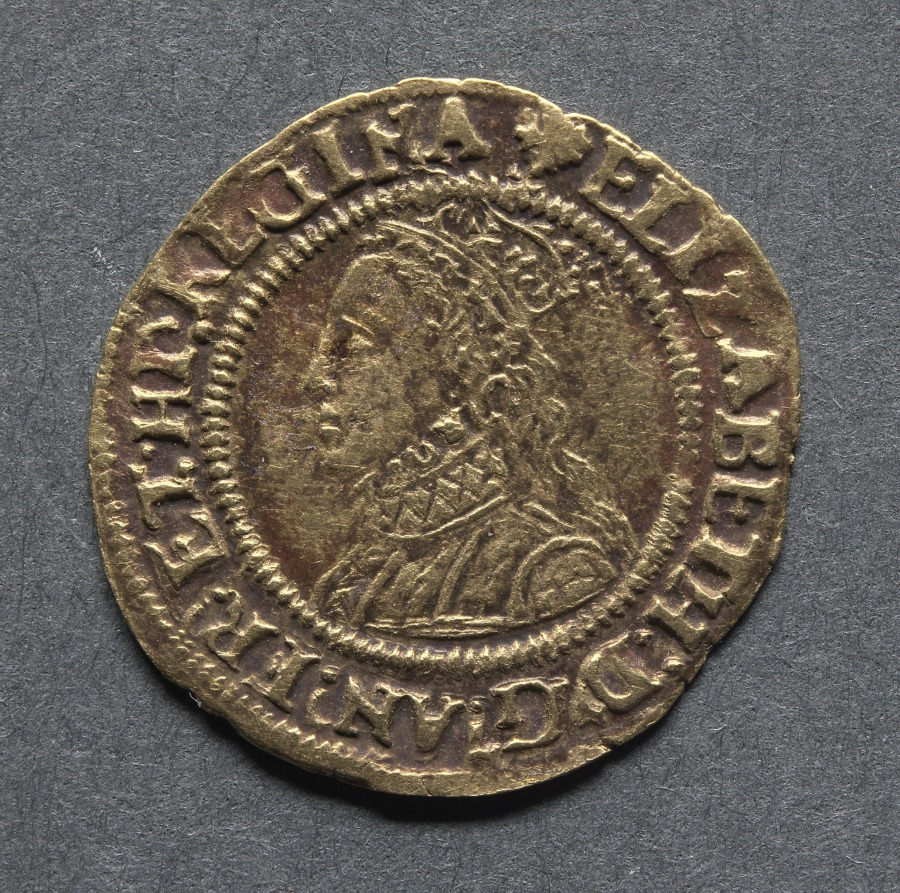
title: Halfcrown: Elizabeth I (obverse); Crowned Shield of Arms (reverse)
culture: England, Elizabeth I, 1558-1603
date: 1560–61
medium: gold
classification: Coins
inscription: ELIZABETH D G AN FR ET HI REGINA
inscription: SCVTVM FIDEI PROTEGET EAM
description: A rare coin, the portrait of the queen is very well executed. There are two types of this coin that feature a bust of the queen. They vary considerably, this one being less ornate than the second, 1969.184. Elizabeth I chose a Latin phrase, SCVTVM FIDEI PROTEGET EAM, translated as The Shield of Faith Shall Protect Her to appear on the reverse of some of her coins, befitting her precarious position.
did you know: This small coin, a halfcrown, would have been more accessible to ordinary citizens and their chance to see a portrait of the queen.